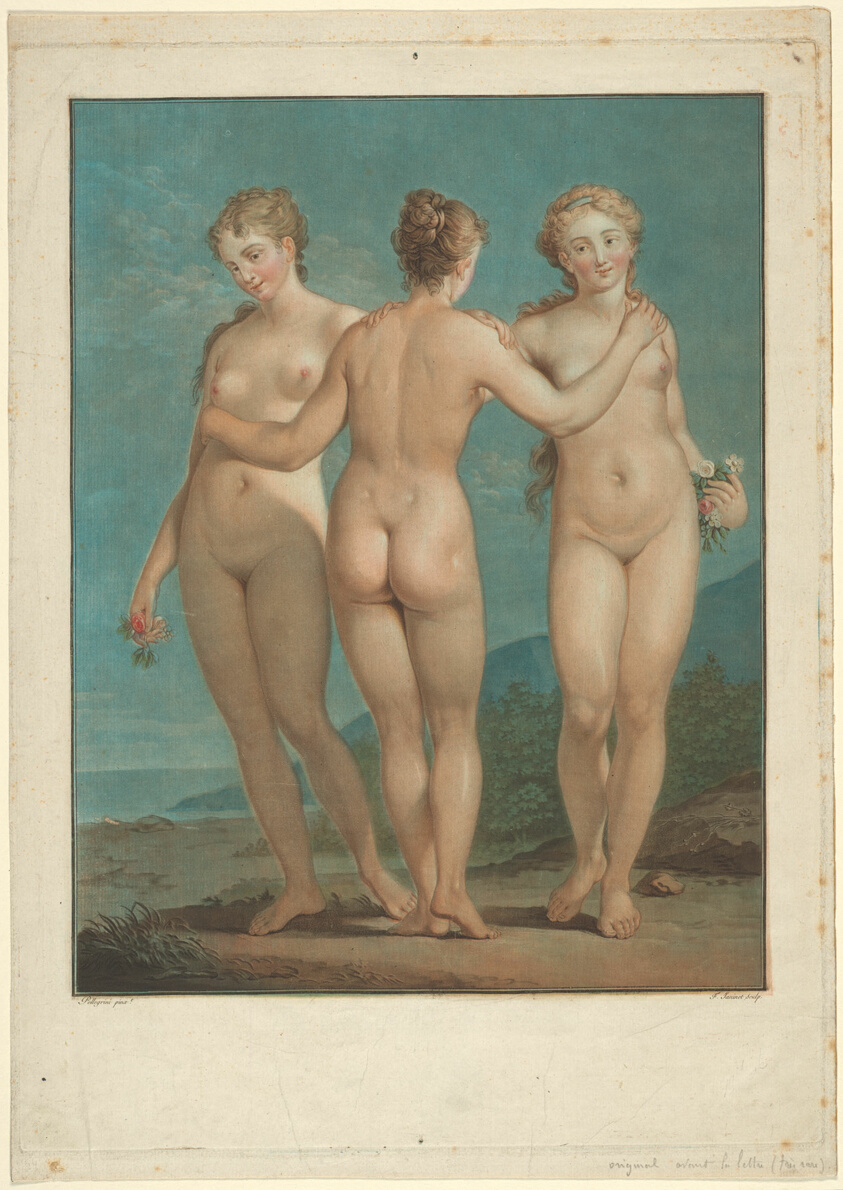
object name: Print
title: The Three Graces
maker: Jean-François Janinet; French, 1752-1814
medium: Color engraving on paper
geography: France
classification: aquatint; print; prints and drawing